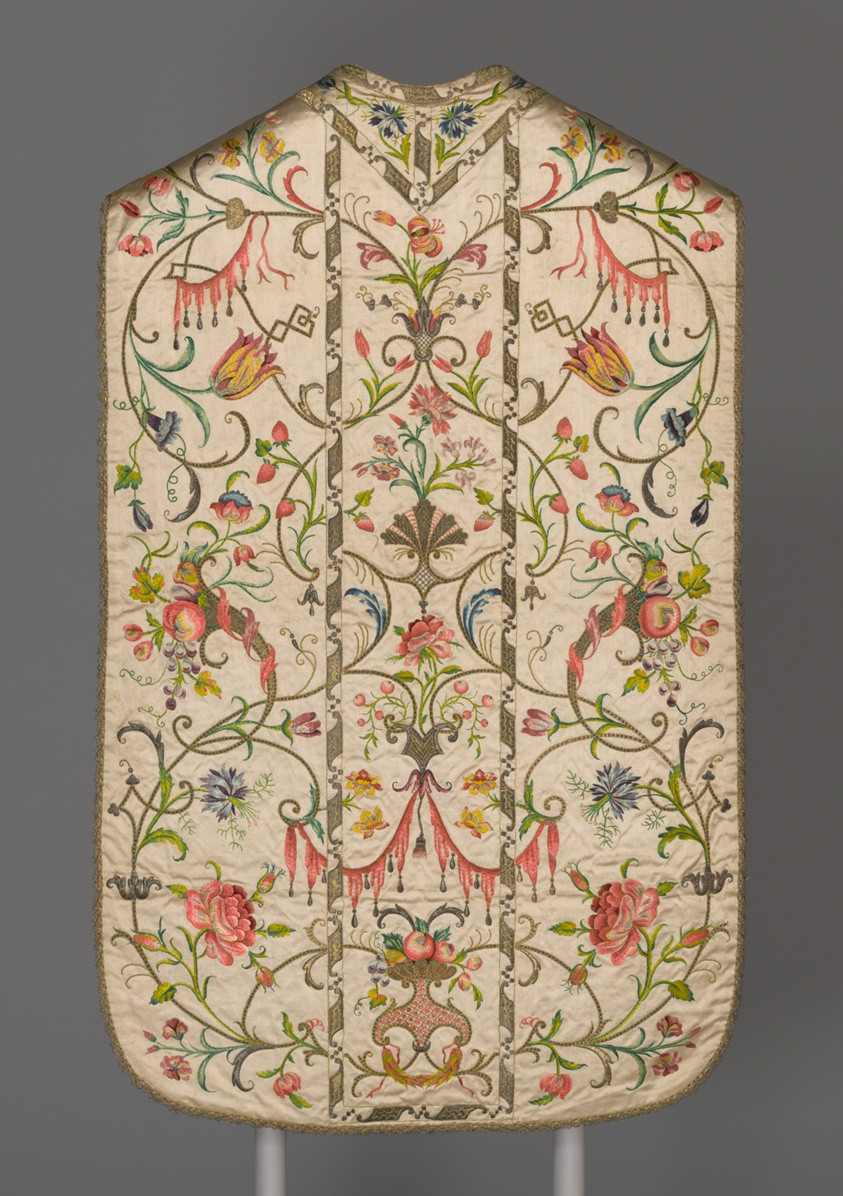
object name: Costume and Accessories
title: Chasuble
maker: Italy, Piemonte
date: 1740/50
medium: Silk, warp-float faced 7:1 satin weave; embroidered with silk and gilt- and silvered-metal-strip-wrapped silk in satin and split stitches; laid work, couching, and padded couching; lined with silk, plain weave; underlining with linen, plain weave; edged with gilt-metal-strip-wrapped silk, bobbin lace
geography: Italy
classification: textile; needlework (visual works); liturgical; lace - bobbin; costume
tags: flowers, garlands, swags